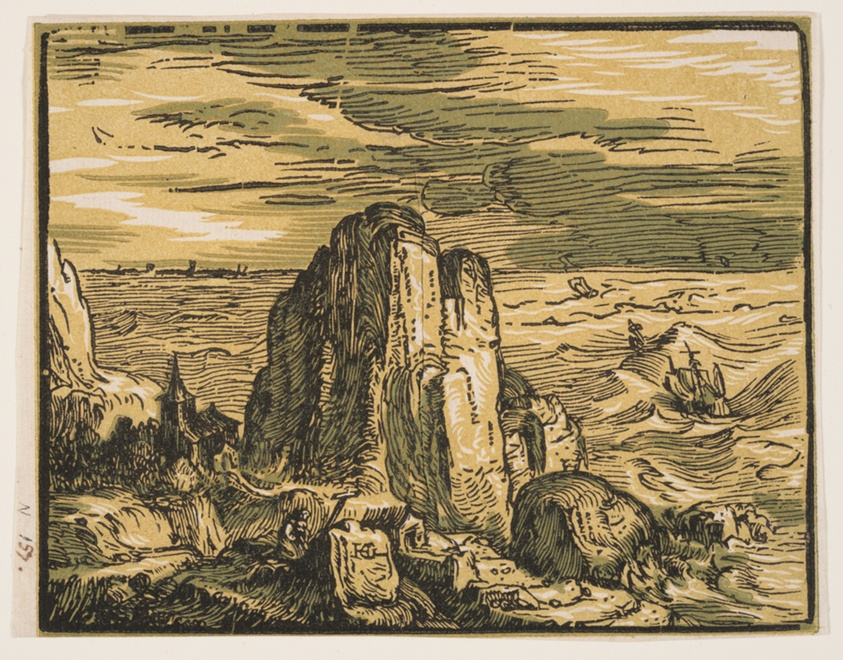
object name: Print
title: Cliff on a Seashore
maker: Hendrick Goltzius (Dutch, 1558–1617)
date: c. 1600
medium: Chiaroscuro woodcut from three blocks printed in green on ivory laid paper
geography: Netherlands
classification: woodcut; paper; print; prints and drawing